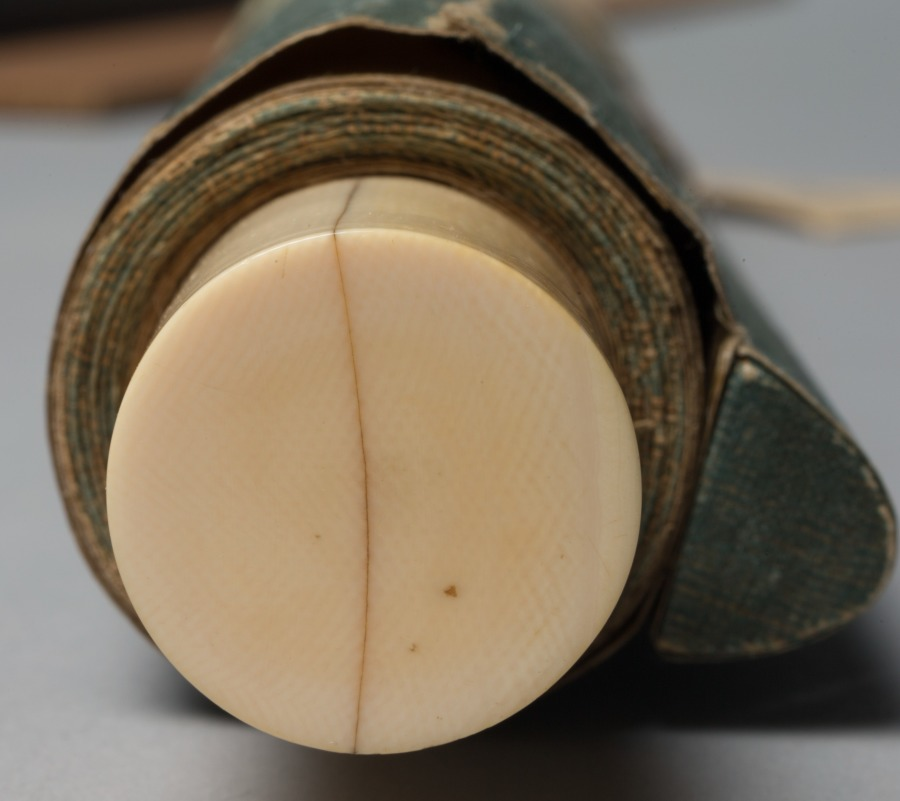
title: Wagtails and Narcissus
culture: Japan, Muromachi period (1392–1573)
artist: Eison (Japanese)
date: mid-1500s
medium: hanging scroll; ink on paper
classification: Painting